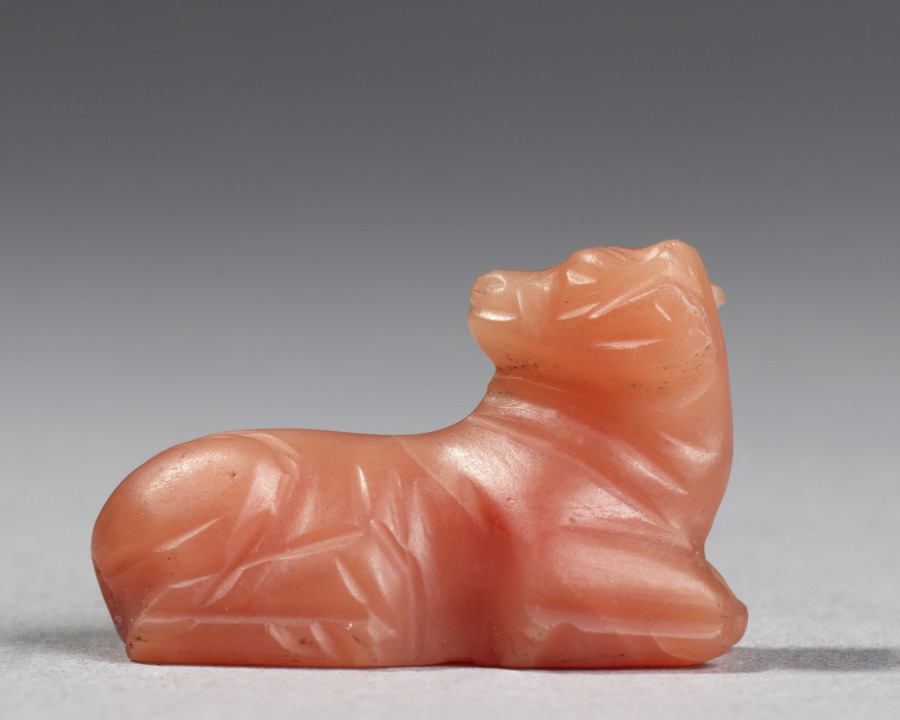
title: Recumbent Calf Amulet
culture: Egypt, New Kingdom (1540–1069 BCE), Dynasty 18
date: 1540–1296 BCE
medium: carnelian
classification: Amulets